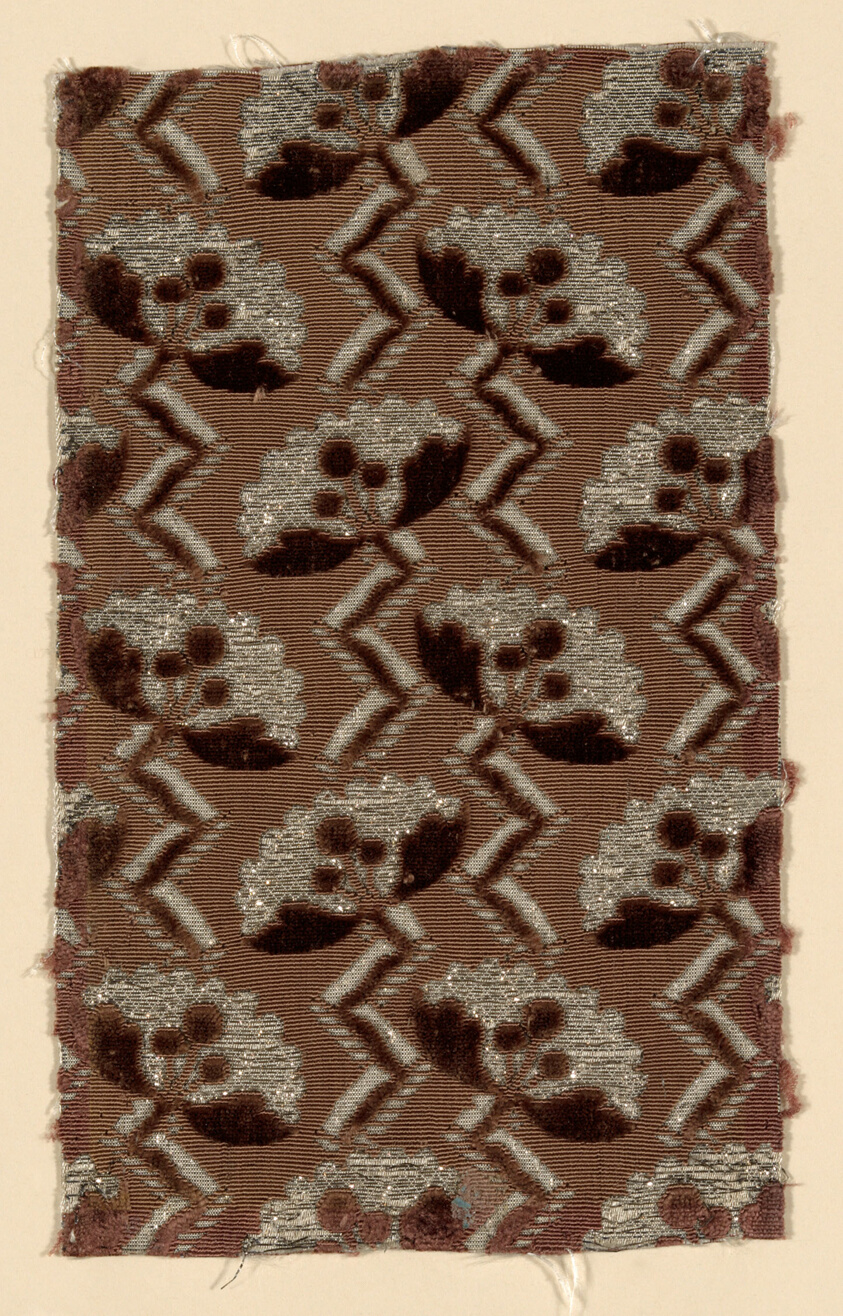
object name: Textile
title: Fragment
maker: France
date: 1750/75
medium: Silk, cut, uncut, and voided velvet with additional patterning weft floats of silver foil tied at intervals against twill weave foundation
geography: France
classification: textile; weaving - velvet